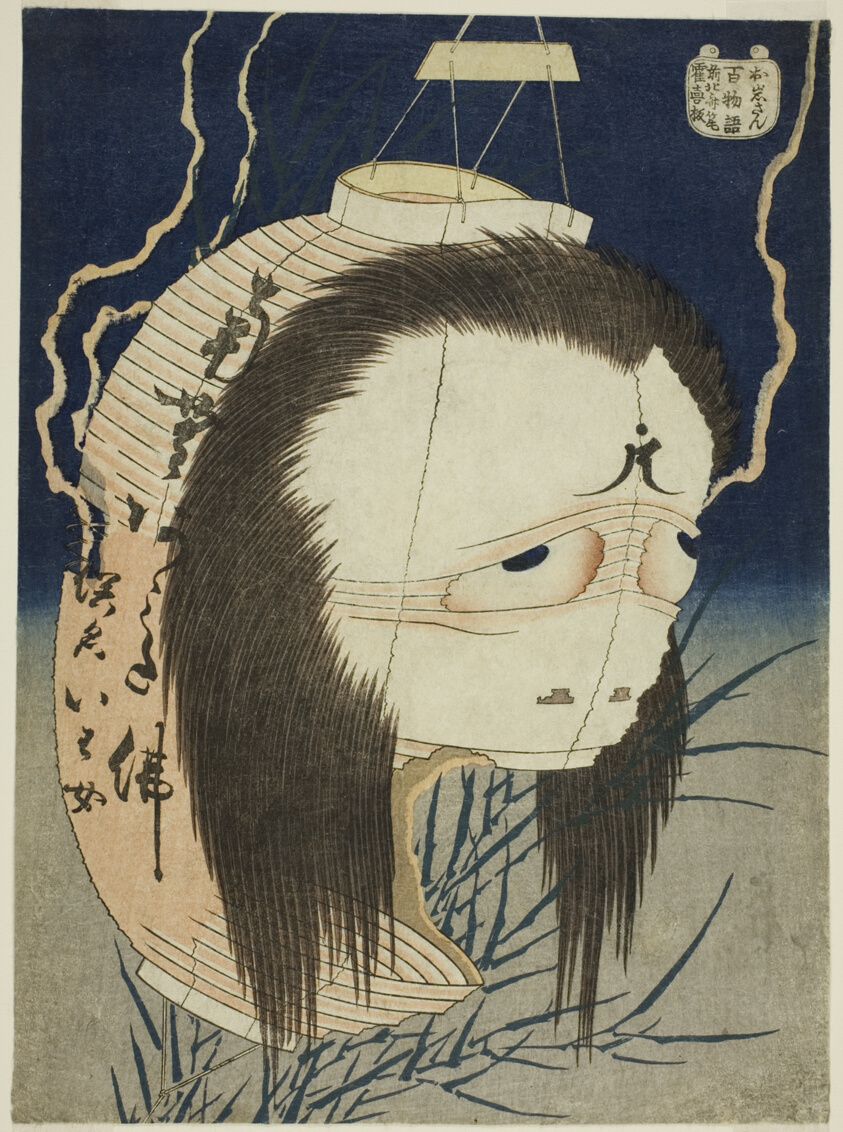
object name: Print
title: Oiwa (Oiwa-san), from the series "One Hundred Ghost Tales (Hyaku monogatari)"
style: Japanese (culture or style)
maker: Katsushika Hokusai 葛飾 北斎 (Japanese, 1760-1849)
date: 1831-32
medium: Color woodblock print; chuban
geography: Japan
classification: woodblock print; print; asian art